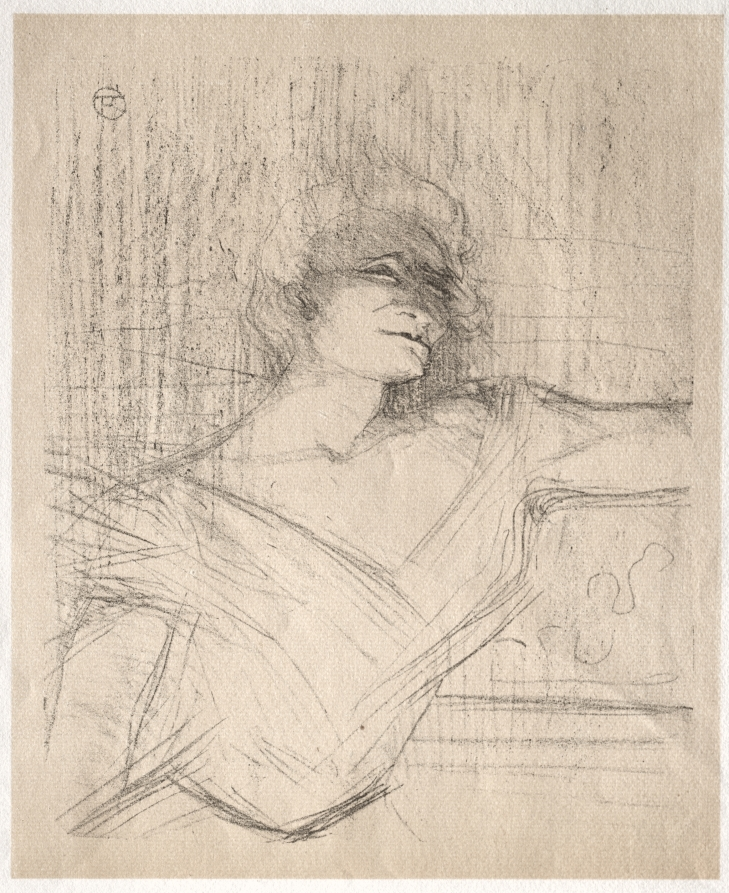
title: Yvette Guilbert: Dans la glu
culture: France, 19th century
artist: Henri de Toulouse-Lautrec (French, 1864–1901)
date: 1898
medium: lithograph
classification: Print